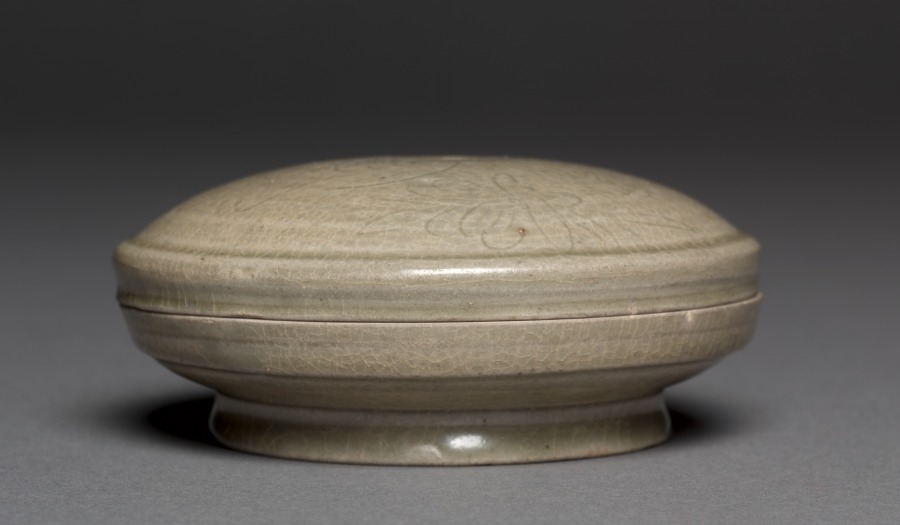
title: Box: Yue ware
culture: China, Zhejiang province, Song dynasty (960-1279)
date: 960–1279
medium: glazed stoneware with incised decoration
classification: Ceramic